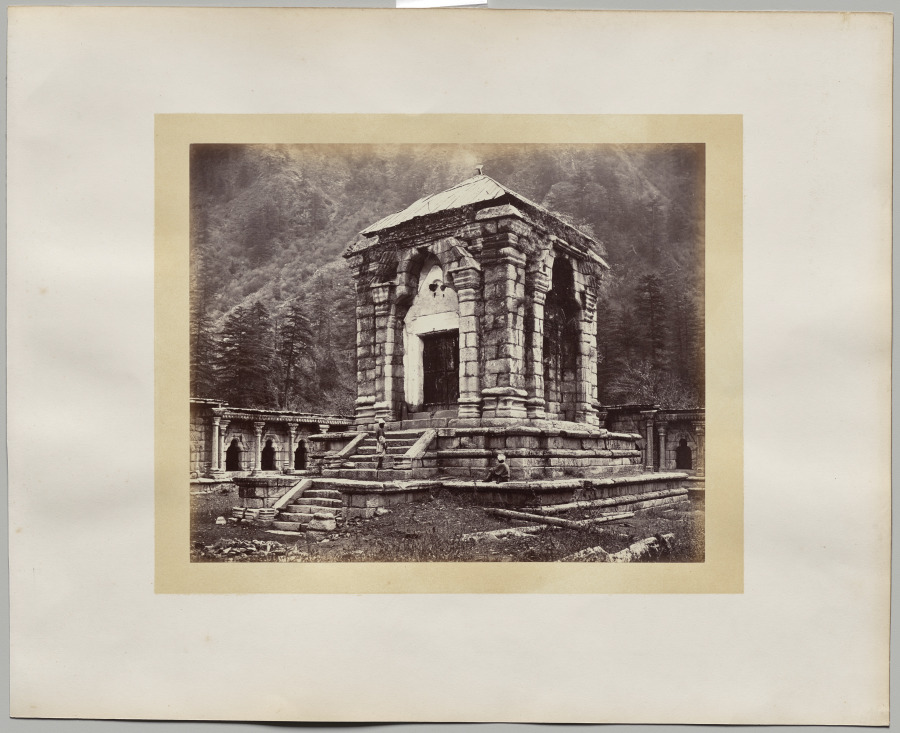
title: Nowshera, Kashmir (number 1000)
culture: England, 19th century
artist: Samuel Bourne (British, 1834–1912)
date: 1864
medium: albumen print from wet collodion negative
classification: Photograph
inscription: Written in black ink on recto in lower left: “Bourne”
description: The Buniyar Temple in Navashera is an exceptionally well-preserved example of Kashmiri architecture, durable because it is made of granite rather than the more common limestone. It is believed to date back to the 8th century. For another view taken on the same day by the same artist, search for 1994.186 and glimpse the temple’s roof over the wall surrounding the area.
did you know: Bourne, a banker who was also a passionate amateur photographer in England, became a professional photographer when he arrived in India in 1863.